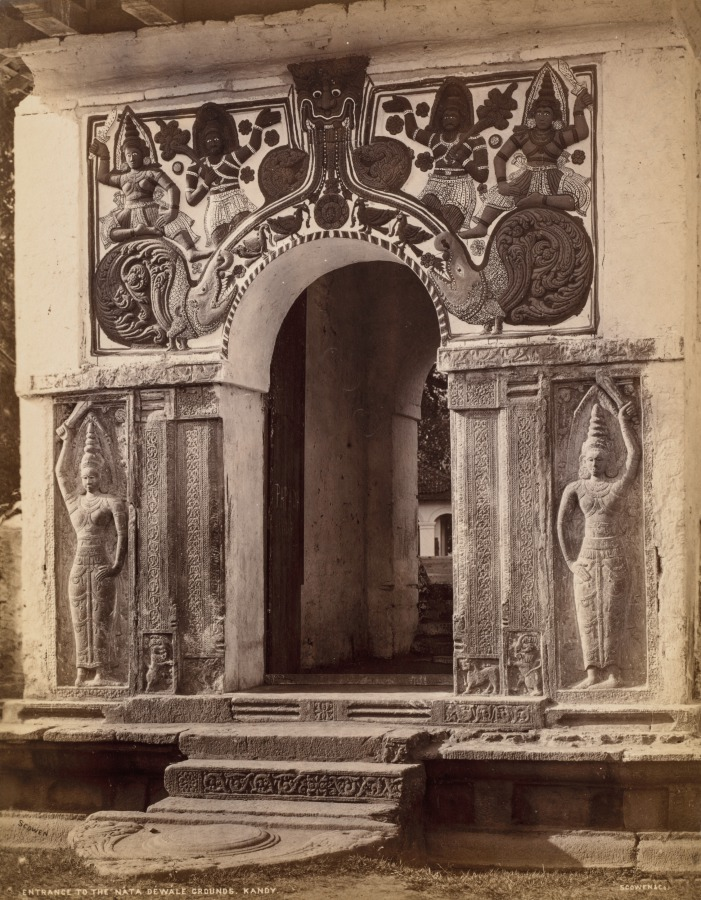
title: Entrance to the Nata Dewale Grounds, Kandy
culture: India, 19th century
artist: Scowen & Co. (British, active Ceylon, 1876–1895)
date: c. 1880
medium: Albumen print from glass plate negative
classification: Photograph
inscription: Written in black ink on recto of mount: “Temple”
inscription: Imprinted in white type on recto of photograph: “ENTRANCE TO THE NATA DEWALE GROUNDS, KANDY”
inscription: Imprinted in black type on recto of photograph: “Scowen”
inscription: Imprinted in white type on recto of photograph: “SCOWEN & Co.”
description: This is probably the entrance to a site for the worship of Natha, the Ceylonese counterpart of the all-compassionate Buddhist deity Mahayana Bodhisattva Avalokitesvara. The shrine in Kandy dedicated to him, considered an especially lucky and sacred place, was where some royal ceremonies were held, including that for the naming of new kings.